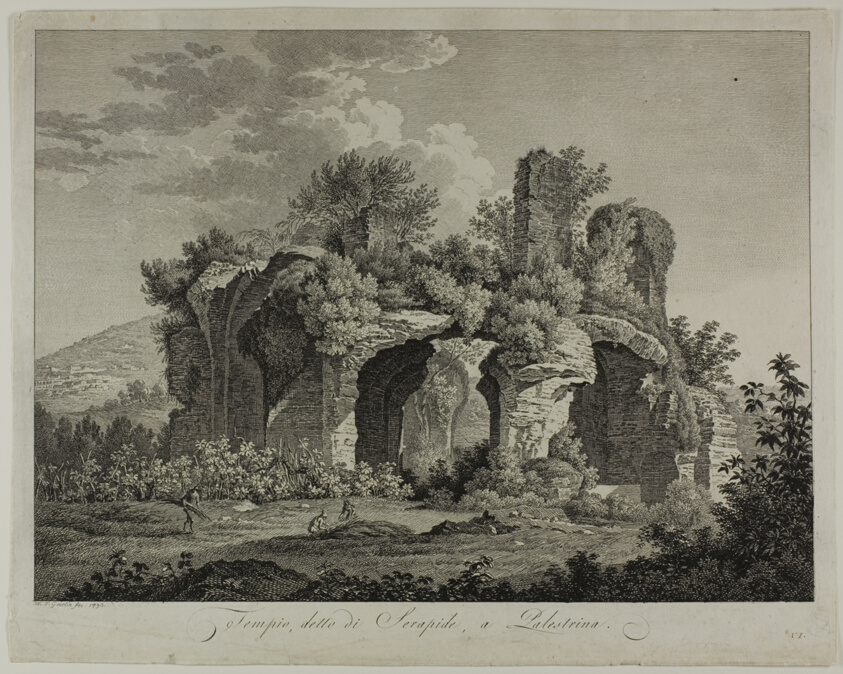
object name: Print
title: Temple of the Serapide Palestrina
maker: Friedrich Wilhelm Gmelin; German, 1760-1820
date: 1793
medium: Etching on ivory wove paper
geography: Germany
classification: etching; print; prints and drawing